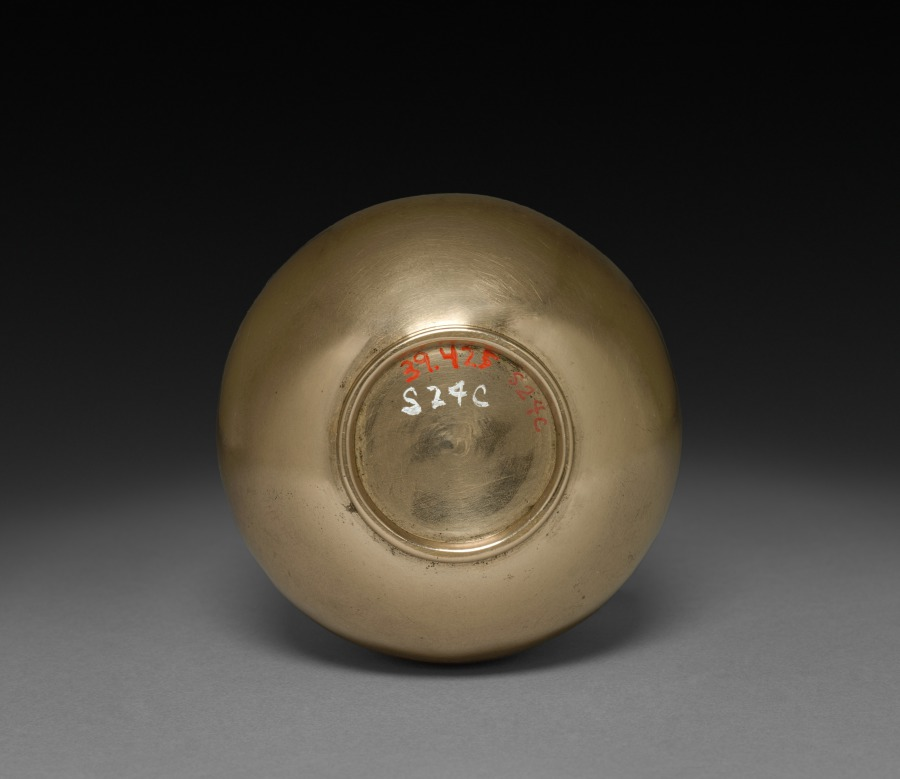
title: Container (base)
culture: Japan, Meiji period (1868–1912) to Taishō period (1912–26)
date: early 1900s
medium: brass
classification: Metalwork